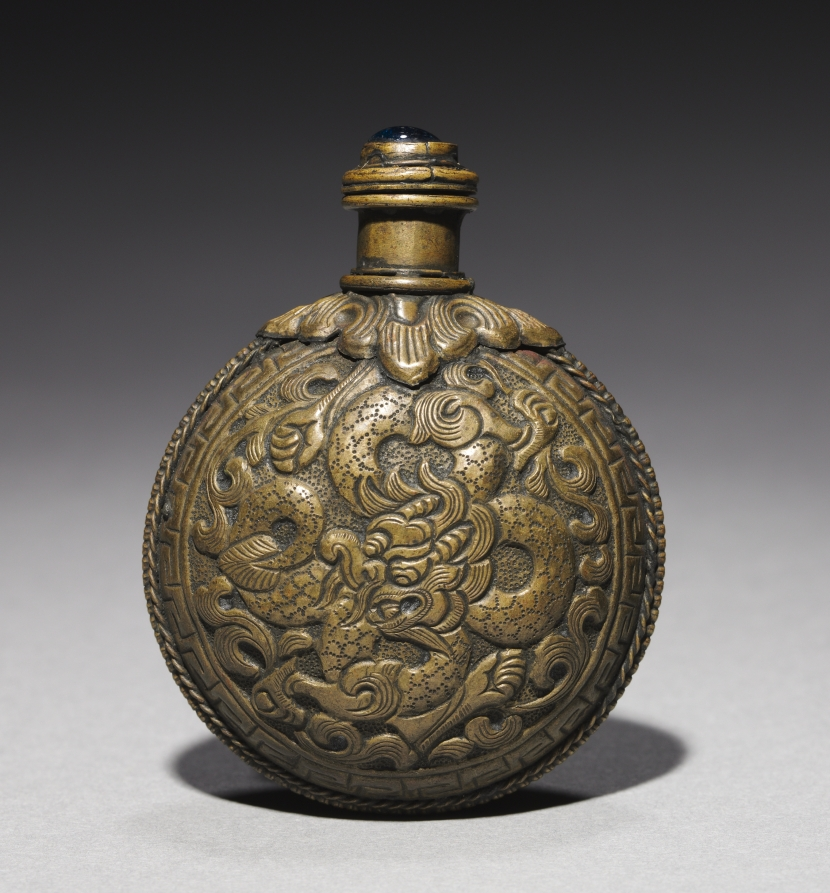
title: Snuff Bottle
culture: China, Qing dynasty (1644-1911)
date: c. 1800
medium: bronze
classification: Metalwork